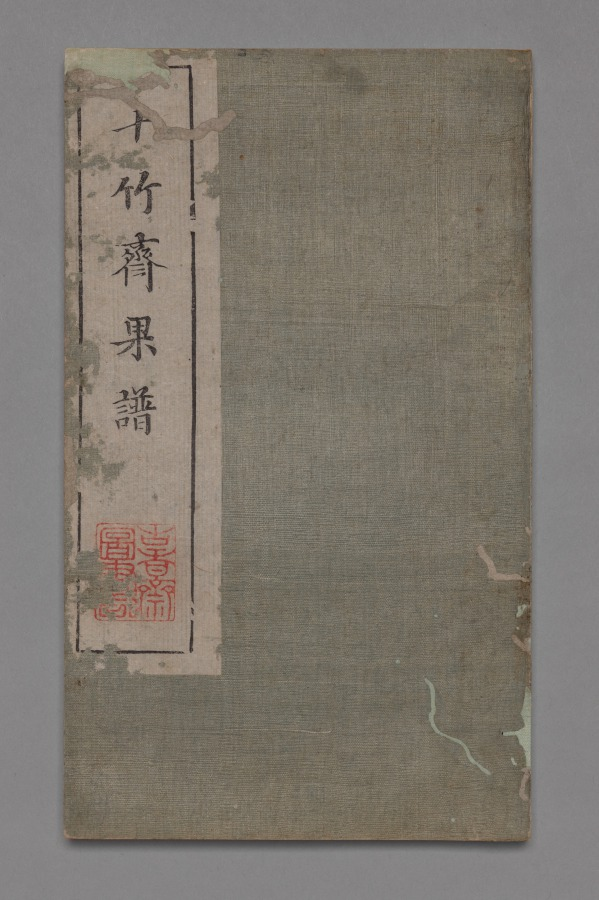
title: Ten Bamboo Studio Painting and Calligraphy Handbook (Shizhuzhai shuhua pu): Fruit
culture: China, Qing dynasty (1644-1911)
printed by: Hu Zhengyan (Chinese, c. 1584–1674)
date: 1633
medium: Woodblock-printed book; ink and colors on paper; first edition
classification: Print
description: Color printing reached a level of perfection in the early 1600s, as seen in this Ten Bamboo Studio Collection of Calligraphy and Painting and the Mustard Seed Garden Manual of Painting (printed 1679 and 1701). The painterly quality, precision in registering (aligning) the woodblocks, and harmonious colors made them the most successful color print editions in Chinese history. Both editions were printed and compiled in Nanjing, spread nationwide, and had a great impact on the arts in Japan and Korea.